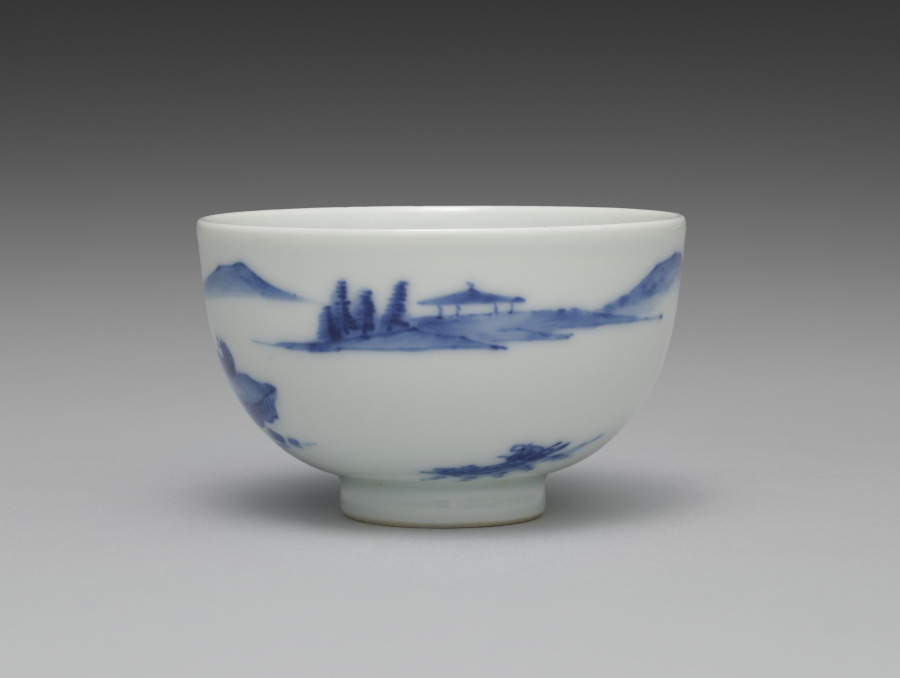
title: Teacup from Tea Set with Chinese Landscape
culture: Japan, Meiji period (1868–1912)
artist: Seifū Yohei III (Japanese, 1851–1914)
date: 1893–1914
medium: Porcelain with underglaze blue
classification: Ceramic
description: The theme of this sencha tea set is the Chinese scholar-recluse in an idyllic landscape. Each of the five teacups has a landscape with an architectural structure and some human activity. This tea set has a side-handled pot called a kyūsu, used for steeping, straining, and serving tea. Unlike some others, this set also has a yuzamashi, a container used to cool boiled water to just the right temperature for the best flavor when steeping. Seifū Yohei III’s painting teacher, Tanomura Chokunyū (1814–1907), made a visual record of famous sencha events that shows how these kinds of porcelains fit with objects such as a stove and kettle to form a complete set of utensils for tea preparation, and with ensembles of decorative objects meant to inspire creativity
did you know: This cup shows a man rowing a little skiff, which disturbs the otherwise still water. Behind him in the distance is an open-air pavilion. He is making his way toward a pair of figures playing a board game, much like the scene on the teapot. Down the hill from them is a residence; beyond this, a flock of geese approaches through the sky.